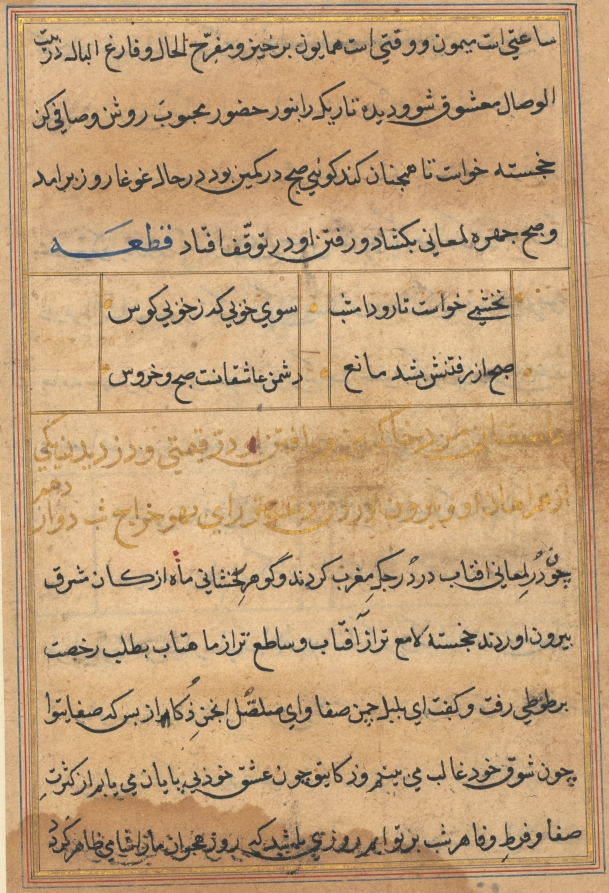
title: Tuti-Nama (Tales of a Parrot)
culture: Mughal India, court of Akbar (reigned 1556–1605)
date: c. 1560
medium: gum tempera, ink, and gold on paper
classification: Painting